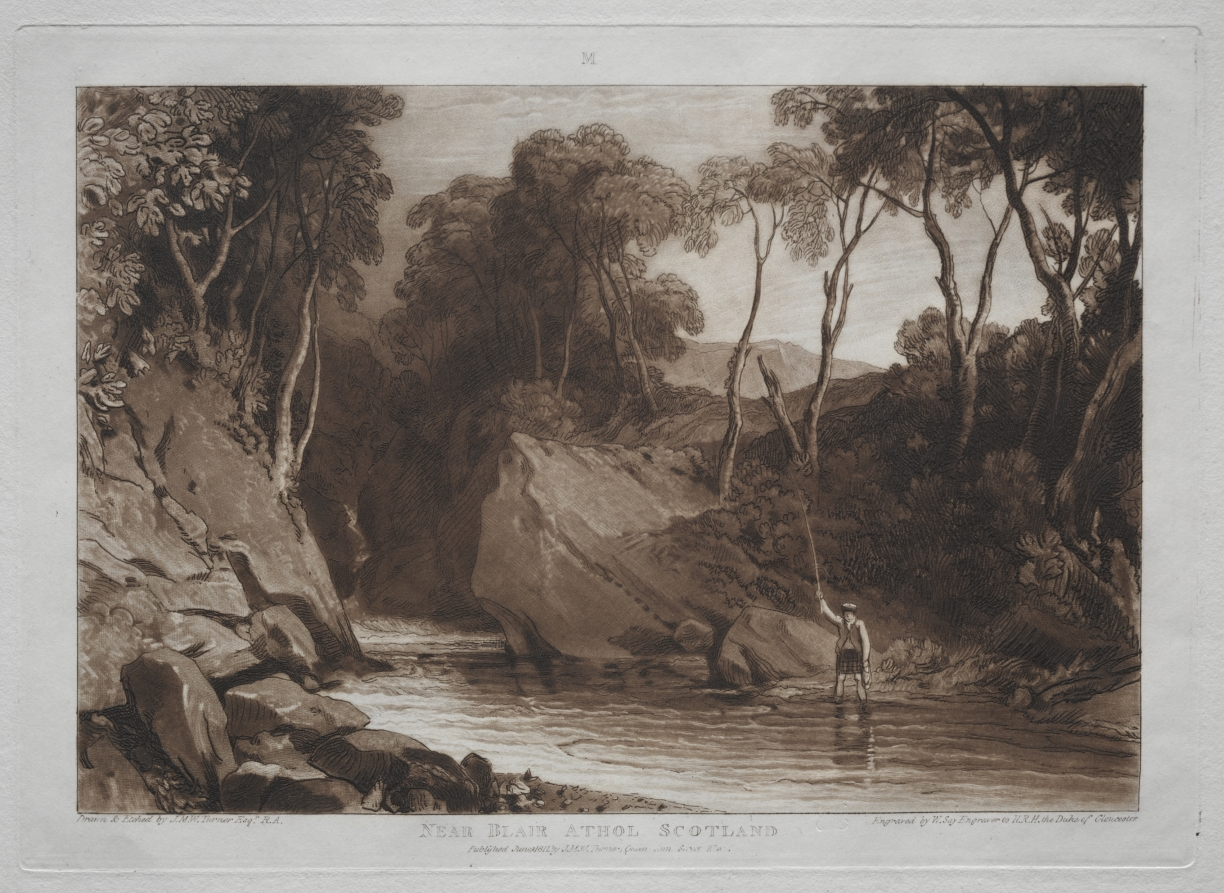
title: Liber Studiorum: Near Blain Athol, Scotland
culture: England, 19th century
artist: Joseph Mallord William Turner (British, 1775–1851)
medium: etching and mezzotint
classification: Print